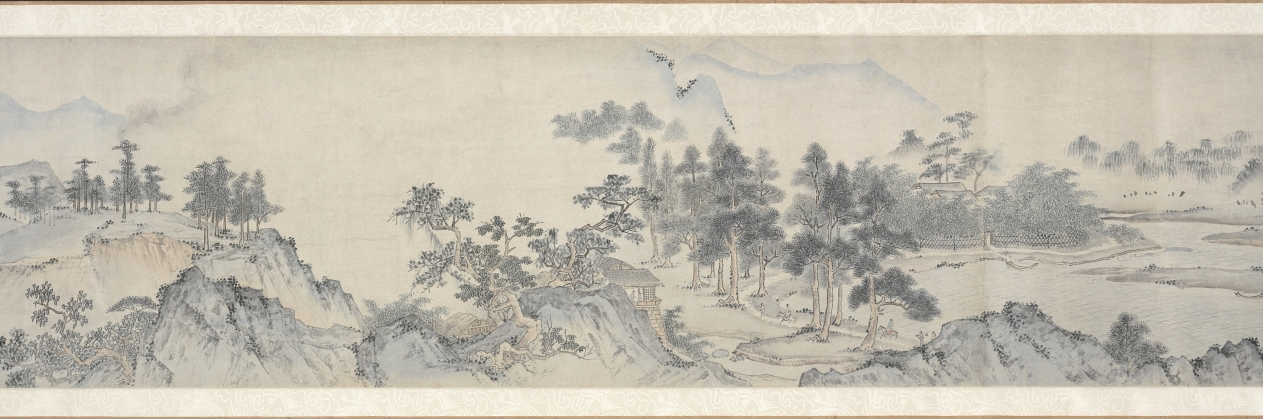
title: Ten Thousand Li of the Yangzi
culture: China, Ming dynasty (1368–1644)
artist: Dai Jin (Chinese, 1388–1462)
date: c. 1400s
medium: Handscroll; ink and color on paper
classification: Painting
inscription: Two colophons at end. Artist's seals: Dai Jin 戴進 and Wenjin 文進.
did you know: Dai Jin is traditionally considered the founder of the Zhe School, a style of landscape painting.